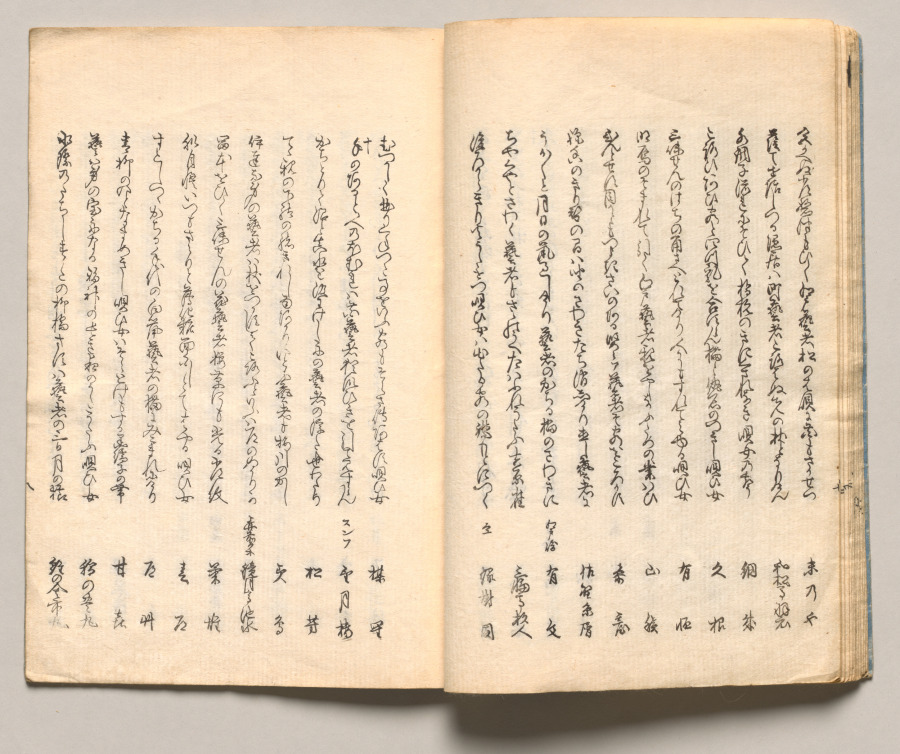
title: Spread Sixteen from Volume One of People of Japan in Light Verse (Kyōka)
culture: Japan, Edo period (1615–1868)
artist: Utagawa Hiroshige (Japanese, 1797–1858)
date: 1857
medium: Woodblock-printed book; ink and color on paper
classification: Bound Volume